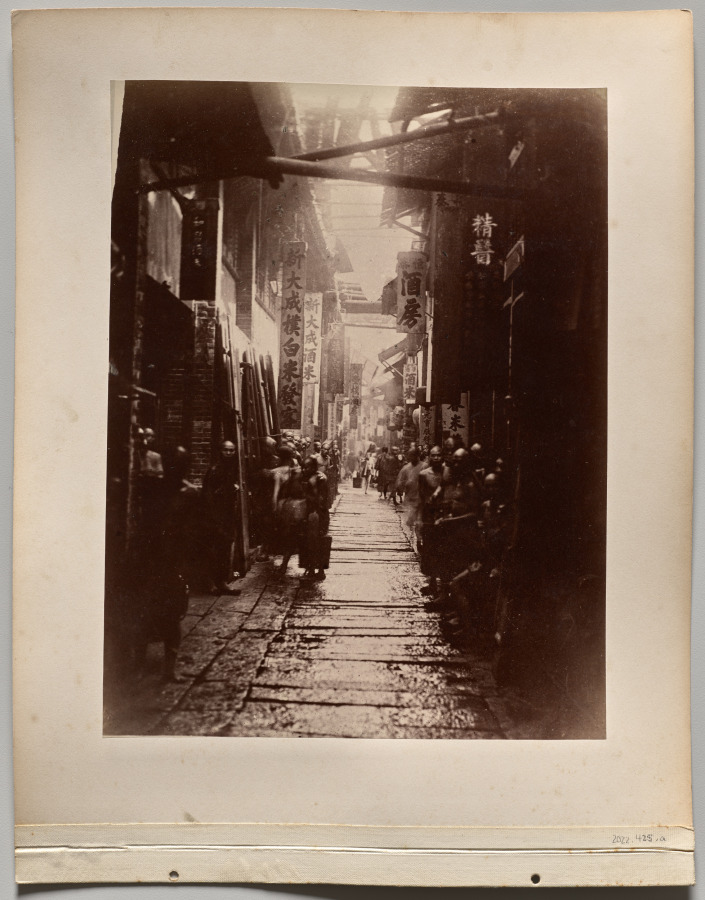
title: Commercial Street, Canton (recto)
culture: China, 19th century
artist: Lai Fong (Afong Studio) (Chinese, c. 1839–1890)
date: c. 1860s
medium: albumen print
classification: Photograph